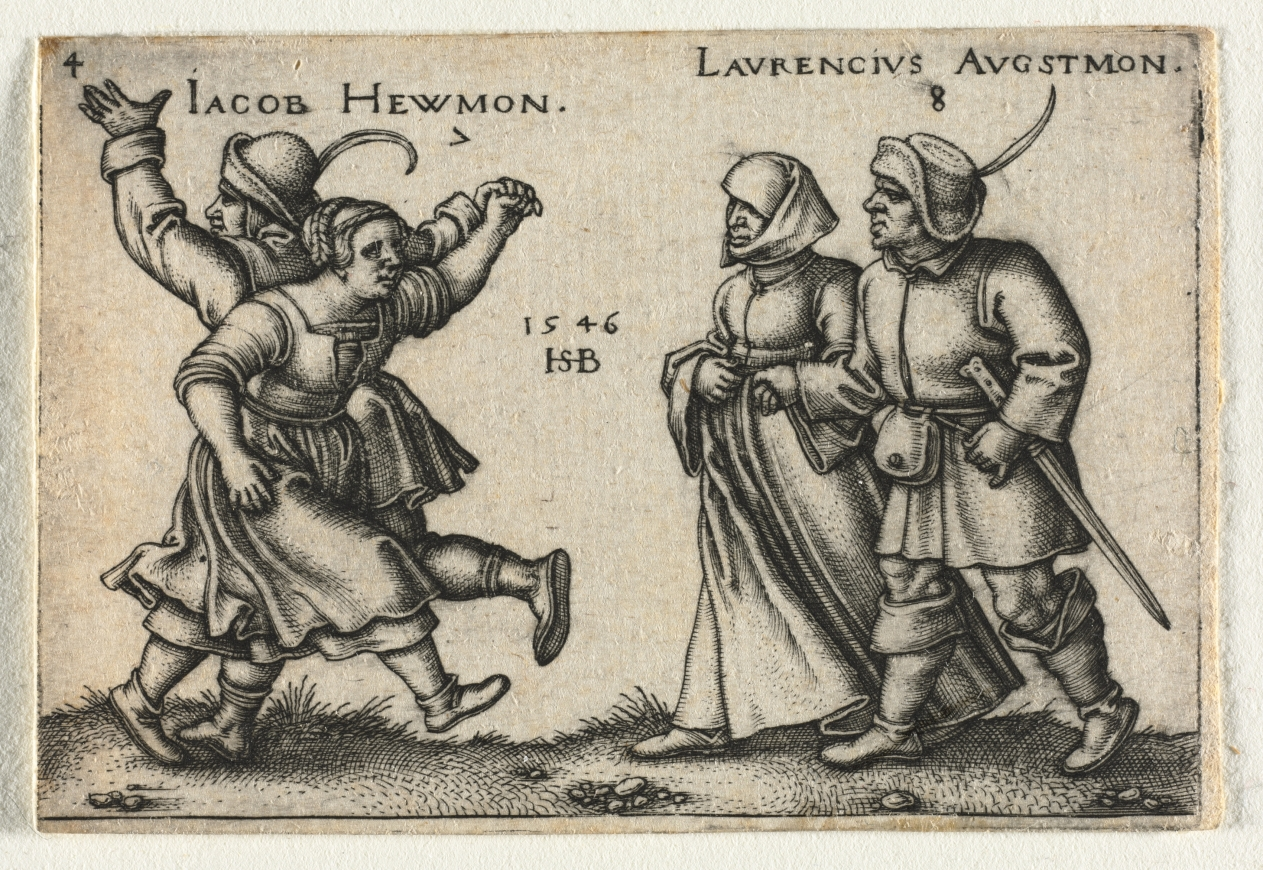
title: The Peasant Wedding or the Twelve Months: 7 Jacob Hewmon 8-Laurencius Augstmon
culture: Germany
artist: Hans Sebald Beham (German, 1500–1550)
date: 1546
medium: engraving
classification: Print